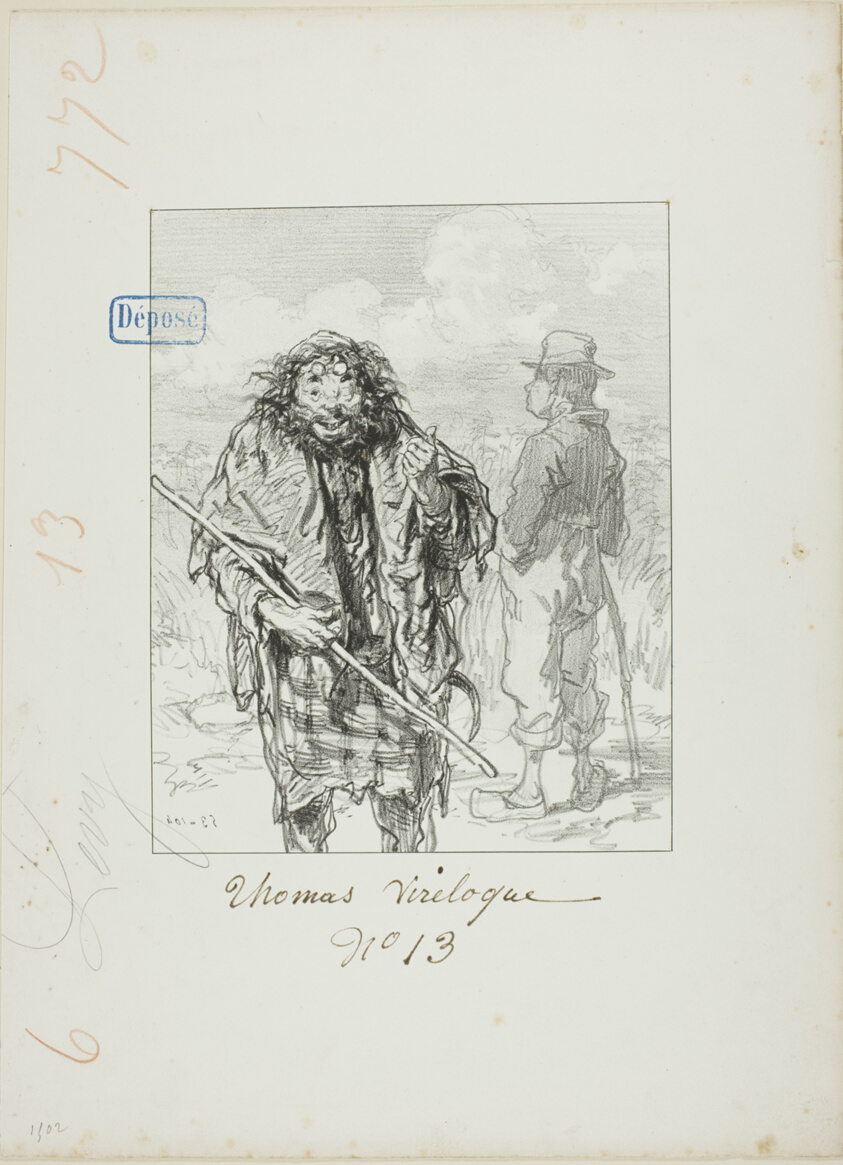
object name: Print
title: Les Propos de Thomas Vireloque: Matthew has only this in his favor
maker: Paul Gavarni (French, 1804-1866)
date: 1853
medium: Lithograph in black on cream wove paper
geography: France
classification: lithograph; print; prints and drawing